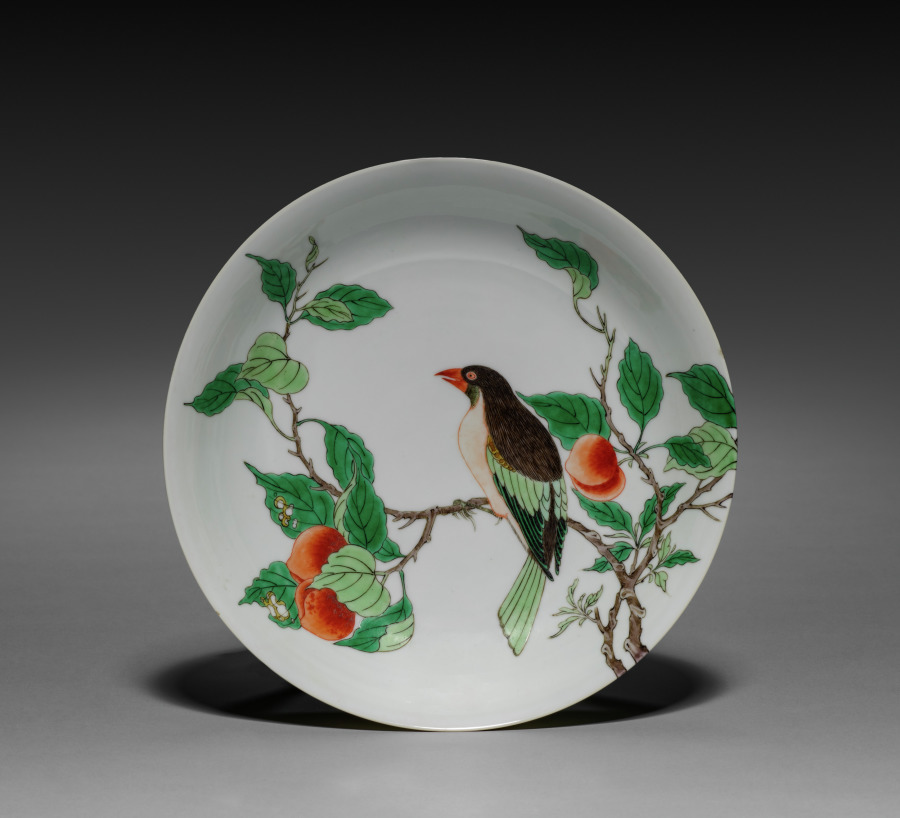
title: Dish with Bird on Fruit Tree Branch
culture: China, Jiangxi province, Jingdezhen kilns, Qing dynasty (1644–1911), Kangxi mark and reign (1662–1722)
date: 1662–1722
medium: Porcelain with famille-verte overglaze enamel decoration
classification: Ceramic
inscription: 大清康熙年制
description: Porcelain decorators in the Qing dynasty broadened the palette of naturalistic colors available to their predecessors with the technique of overglaze painting. They carefully painted designs in low-fire, lead-based glazes on top of undecorated glazed porcelains that had already been fired to the required 1200 degrees Celsius. After the pieces were painted, they were fired a second time to set and fix the glazes to the surface. With sharp images in translucent colors on thin white bodies, porcelains such as these mark the final technical and aesthetic accomplishment of the Chinese ceramic tradition.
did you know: This dish is related to the set created for the Kangxi emperor's 60th birthday.